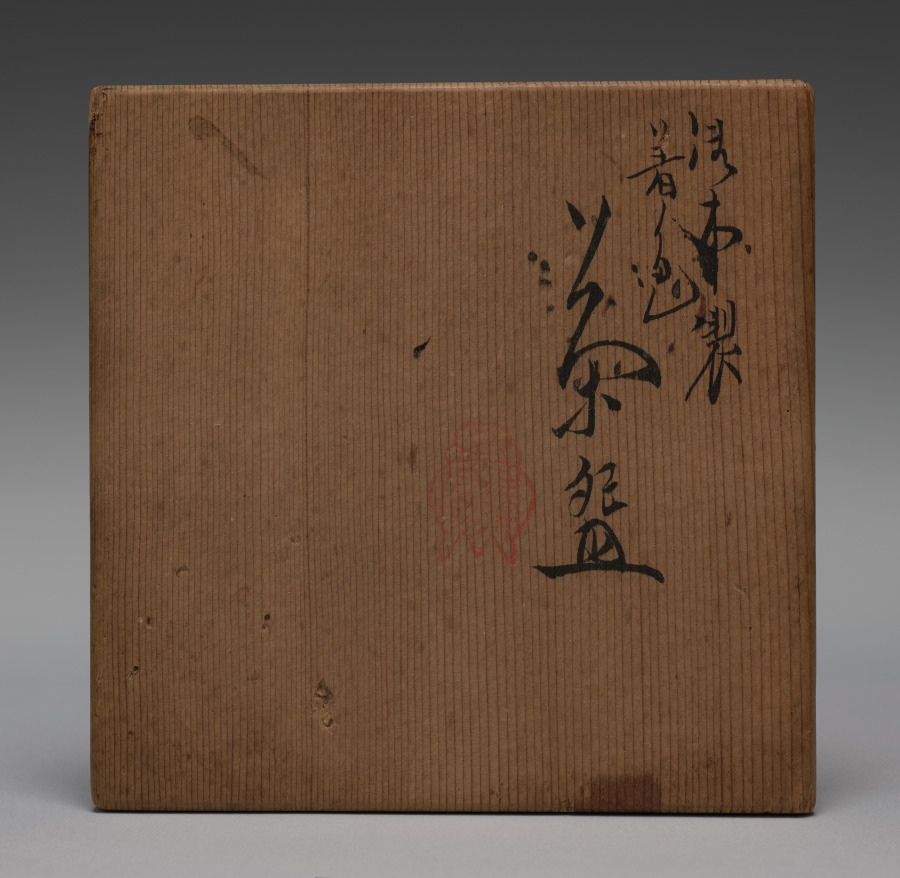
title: Teabowl with Pinks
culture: Japan, Meiji period (1868–1912)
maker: Seifū Yohei III (Japanese, 1851–1914)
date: 1893–1914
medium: Stoneware with crackled glaze and overglaze color enamel and gold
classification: Ceramic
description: This teabowl, for use in chanoyu, is a good example of Yohei III’s mastery of the techniques involved in producing Kyoto ware. The painting of the pinks, with their blue centers, bright red petals, and green leaves, is carefully controlled with crisp gold borders throughout. There is crackling in the transparent glaze and obvious, thick dripping of the milky glaze over the outside of the mouth of the bowl. The pink spots would have appeared in the clay during firing, and the bottom of the inside of the bowl is entirely pink. A triangular wedge has been cut away from the foot, and a gently impressed band rings the bowl beneath the rim.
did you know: The vessel comes with a bespoke brocade pouch with a silk fastening cord, as is customary for Japanese teabowls.